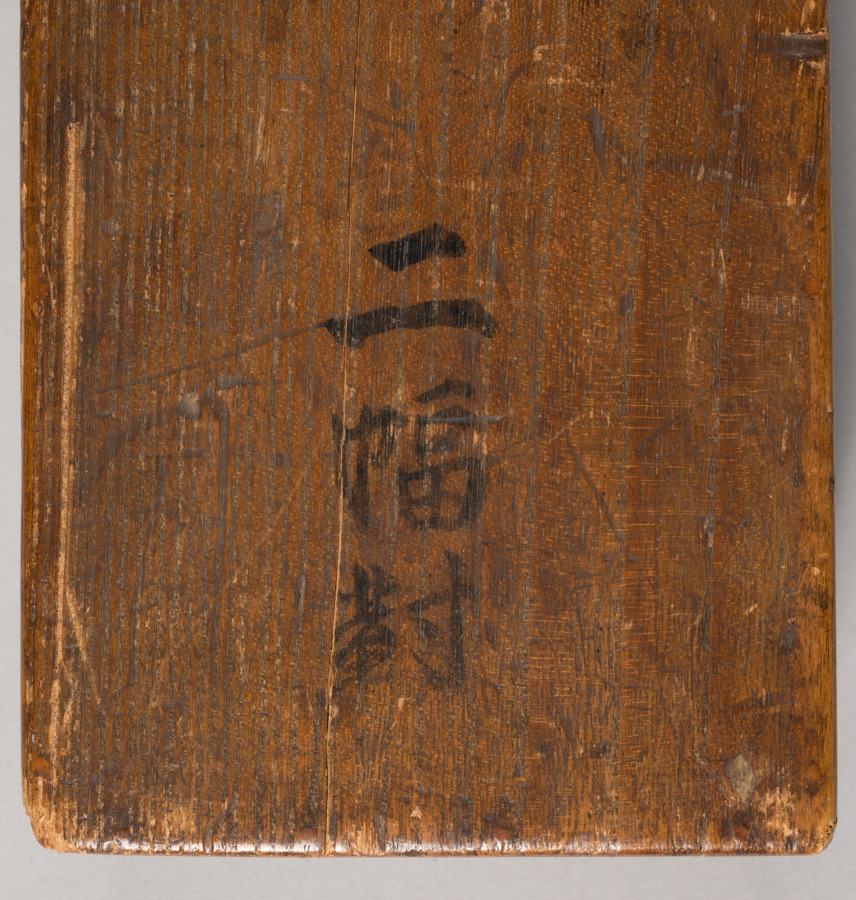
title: Bamboo in Rain; Bamboo in Wind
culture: Japan, Muromachi period (1392–1573)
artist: Genga (Japanese)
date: early 1500s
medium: hanging scroll; ink on silk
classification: Painting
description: East Asian paintings from China, Korea, and Japan were frequently conceived as sets of multiple images. These sets might have been composed for specific palace or temple rooms, or to portray a specific theme, such as the four seasons. Over time, the original intent of such sets is often lost through damage, changes in ownership, or a variety of other reasons. The identity of the artist can also be lost, but then, sometimes, retrieved. This pair of ink paintings has traditionally been labeled as Japanese and attributed to the 16th-century painter Genga. Since there are no seals or signature of the artist on the painting, this attribution was based on comparisons of brush style with paintings known to be by Genga. More recent study indicates that while the 16th century is an appropriate time frame for the pair, the precise cultural identity of the artist is not certain after all. The dark, eccentric shapes of the rocks and bamboo clusters and the dramatic tonal contrasts evident throughout the composition point to either Korean authorship or influence upon a Japanese painter of the period.